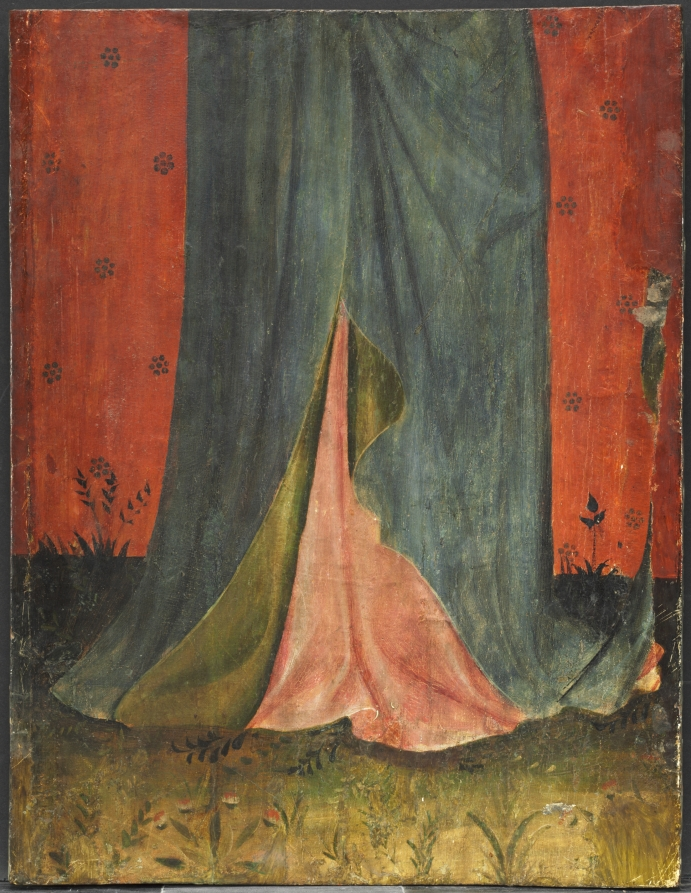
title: Coronation of the Virgin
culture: Germany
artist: Master of the Fröndenberg Altarpiece (German)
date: c. 1410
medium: tempera and gold on wood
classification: Painting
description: This panel once formed the left wing of an altarpiece originally located in a Cistercian convent in the German town of Fröndenberg. The Coronation of the Virgin was a common subject; though it is not based on a biblical text it often appeared in medieval books of hours as a focus of contemplation. It represents the culminating event in the life of Mary. Here, Christ and the Virgin are housed in an architectural setting; the Virgin kneels before Christ as he crowns her in the company of a group of angels. The color palette is particularly rich: pink, deep red, blue, and a delicate green as well as large areas of gold leaf. The well-developed, proportional figures, modeled drapery, and detailed architectural throne suggest an artist with a high level of experience and sophistication.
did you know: This is only one panel from what would have been a large altarpiece dedicated to the Virgin.